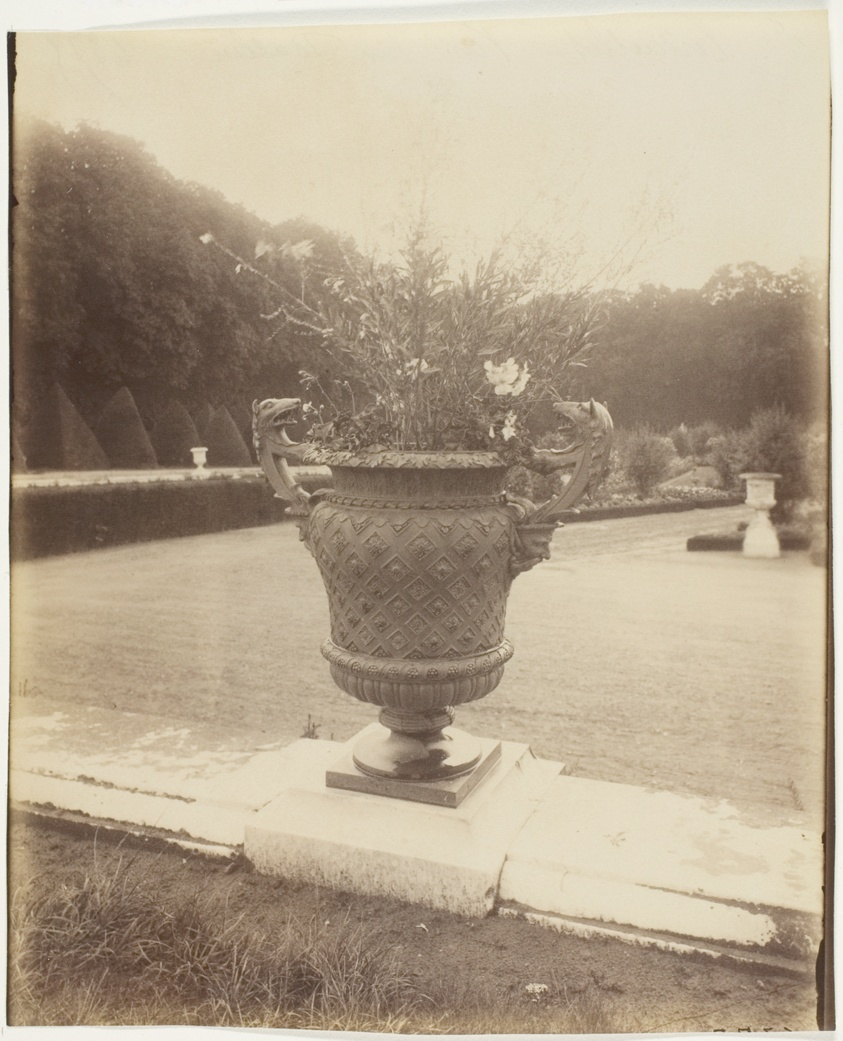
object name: Photograph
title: Versailles, Vase par Ballin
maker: Jean-Eugène-Auguste Atget (French, 1857–1927)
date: 1902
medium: Albumen print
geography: France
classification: albumen silver print; photographic process; photography; photograph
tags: Collected by Hugh Edwards